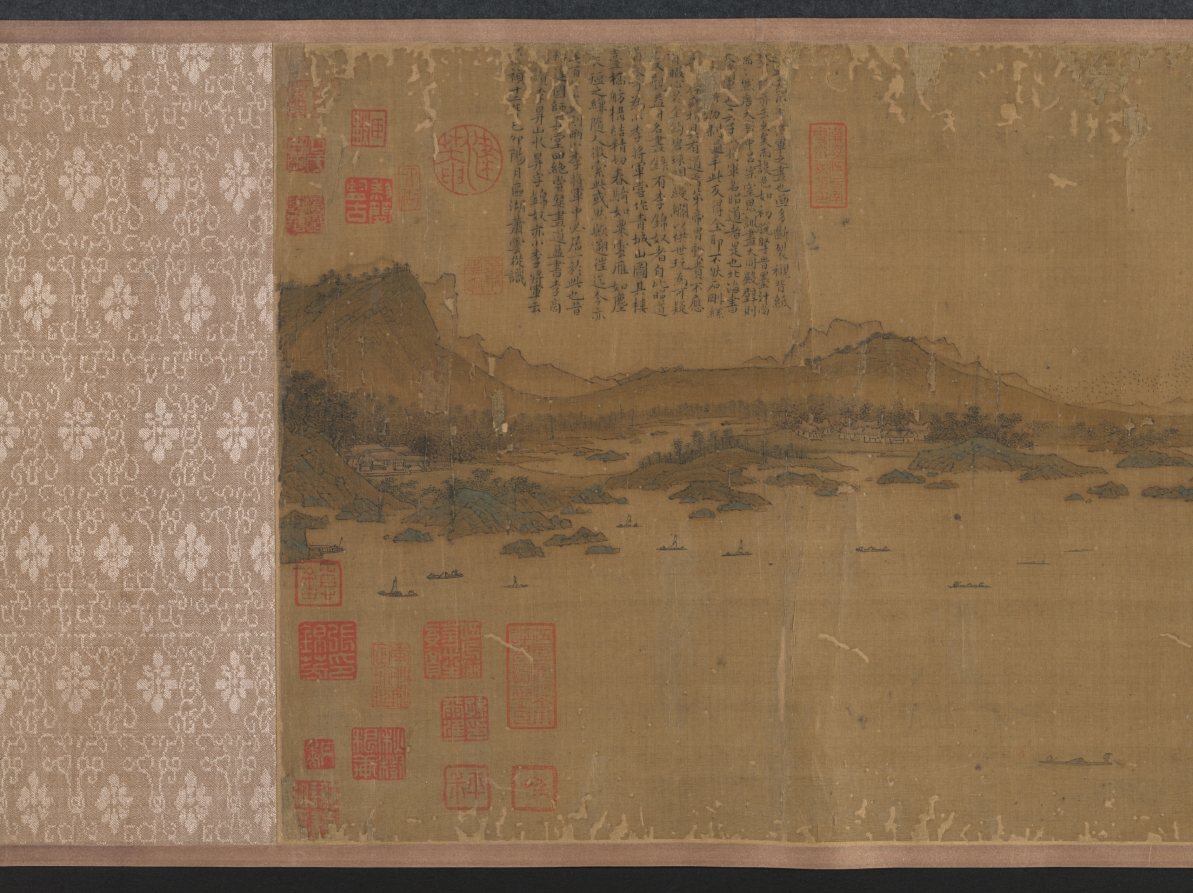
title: Waiting for the Moon in the Mid Autumn Festival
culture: China, Ming dynasty (1368–1644)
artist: Shi Rui (Chinese, c. 1400-c. 1470)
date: 1400s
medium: handscroll, ink, color, and gold on silk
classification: Painting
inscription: [印] 石氏以明; 游戯翰墨.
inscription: 僊山樓觀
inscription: 1 inscription, dated 1639, and 1 seal of Xiao Yuncong 蕭雲従 (1596-1673). Inscription by Xiao Yuncong: This is a painting by the Junior General Li. The painting is damaged and cracked at many places. Many of the paper strips for backing have been missing since long ago, but the colors are still fresh as if they had just been applied and the ink still looks moist. During the reign of Tianbao (742-756) of the Tang Dynasty, the Imperial Klansman Li Sixun was summoned to paint the walls of the Datong Hall. He was known as the "Senior General." His son, who came to be known as the "Junior General," was named Zhaodao. Of the stone epitaph [Li Sixun bei, or the "epitaph of Li Sixun," one of the best known calligraphic monuments of the Tang Dynasty], engraved with the calligraphy of Li Beihai 李北海 [Li Yong 李邕, 678-747], more than half has fallen off. Why, in contrast, was this painting able to survive? Or could it be that despite the fact that the stone is hard and the silk is soft, their preservation or destruction depends on some other factors? Moreover, since they were titled nobility of imperial descent, it is doubtful that they had the leisure and the mood to indulge in such decorative and descriptive blue and gold painting for the mere amusement of their fellow men. Recently, I read the Yi zhou ming hua lu 益州名畫錄 [by Huang Xiufu 黃休復, preface 1005]. I found a certain Li Chin-nu who compared himself with Li Zhaodao 李昭道 and was called by the Sichuan people the Junior General Li. In a painting which he did, entitled Mt. Ch'ing-ch'eng, the architectural structure of the pavilions, terraces, bridges, and boats are meticulous and accurate. The horsemen on a spring outing are as small as grain and the wild geese among the clouds as tiny as dust. It was also said that he painted on silk of any length in accordance to specific commissions. Is it possible that this painting is one of his? Since that time 700 years have passed. Yet one of the two Junior General Li's must be our painter. Formerly, there were the so-called "Four Excellents" in the Hall of Portraits of the Buddhist monk Wu-ta Kuo-shih: the [portrait] painting by Ch'ang Ts'an [act. ca. 881-888}, the calligraphy by Priest Tao-ying, the eulogy by Li Shangyin 李商隱 [813-858], and the landscape by Li Sheng [act. ca. 908-925]. This Li Sheng was styled Chin-nu and was also called Junior General Li. In the tenth month of the Chi-mao year, the twelfth year of the Chongzhen era [1639], recorded by Xiao Yuncong of Wuhu. trans. WKH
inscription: 4 colophons and 30 additional seals: 1 seal of Xu Qianxue 徐乾學 (1631-1694); 1 seal of Li Chien 黎簡 (1747-1799); 1 seal of Chang Chin-fang (18th c.); 2 seals of Sun Erzhun 孫爾準 (1770–1832); 1 colophon and 2 seals of Zhang Weiping 張維屛 (1780-1859); 1 seal of Wu Rongguang 吳榮光 (1773-1843); 1 colophon and 2 seals of Luo Tianchi 羅天池 (1826 jinshi); 7 seals of Wu Yanhui 伍元蕙 (active 1821–1851); 2 colophons and 4 seals of Pan Zhengwei 潘正煒 (1791-1850); 9 seals unidentified.